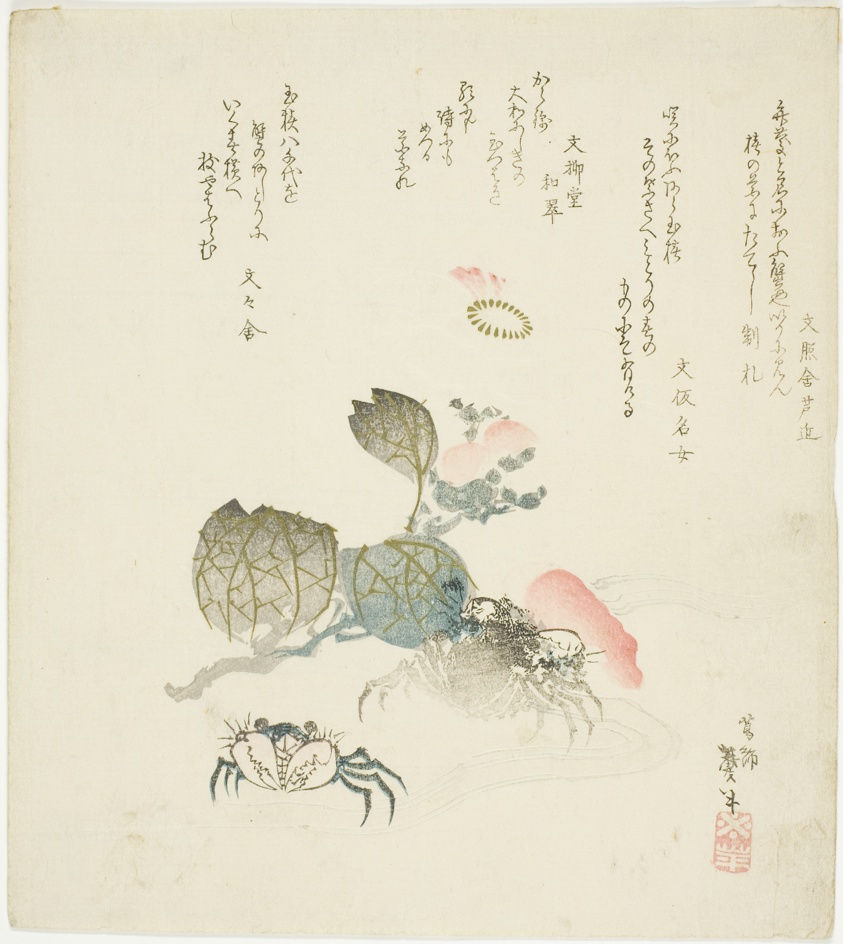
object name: Print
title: Two crabs by a spray of camellia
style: Japanese (culture or style)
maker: Katsushika Taito II (Japanese, active c. 1810-53)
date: late 1820s–early 1830s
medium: Color woodblock print; shikishiban, surimono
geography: Japan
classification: woodblock print; print; asian art